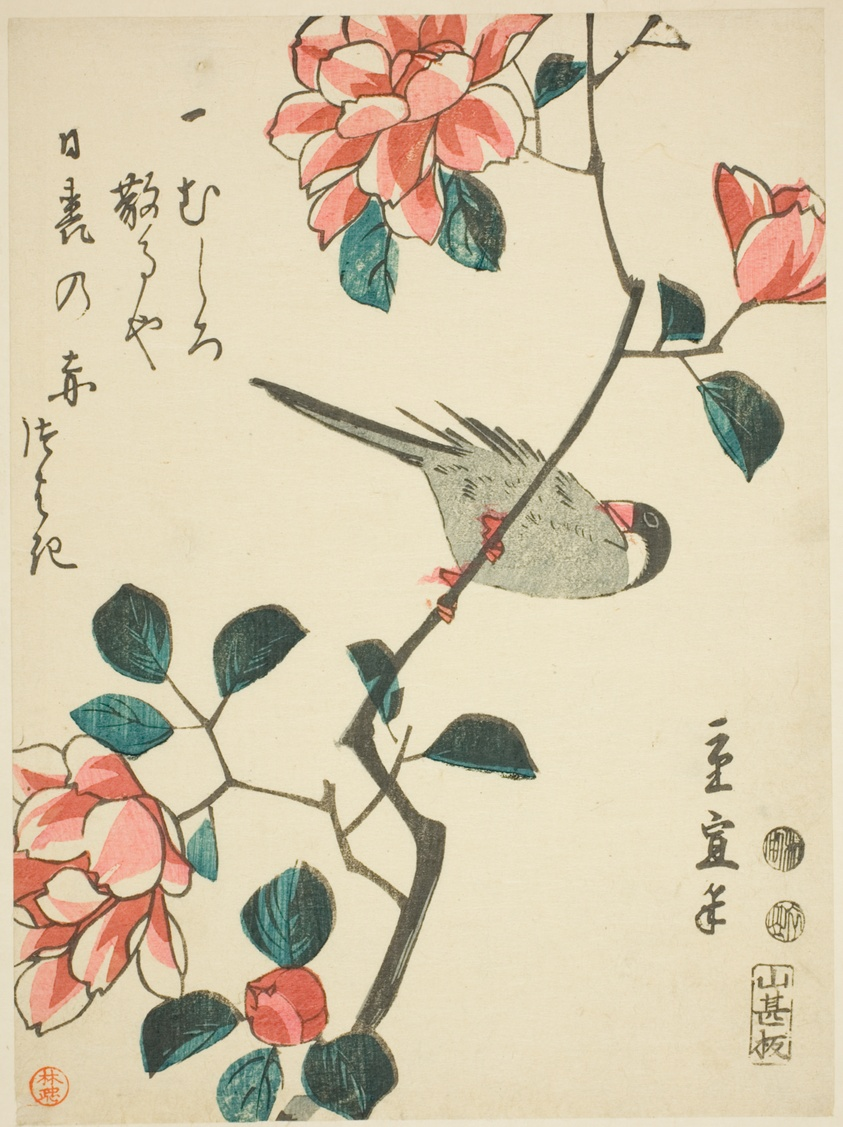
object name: Print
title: Sparrow on camellia branch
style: Japanese (culture or style)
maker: Utagawa Hiroshige II (Shigenobu) (Japanese, 1826–1869)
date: c. 1847/52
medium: Color woodblock print; koban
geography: Japan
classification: woodblock print; print; asian art